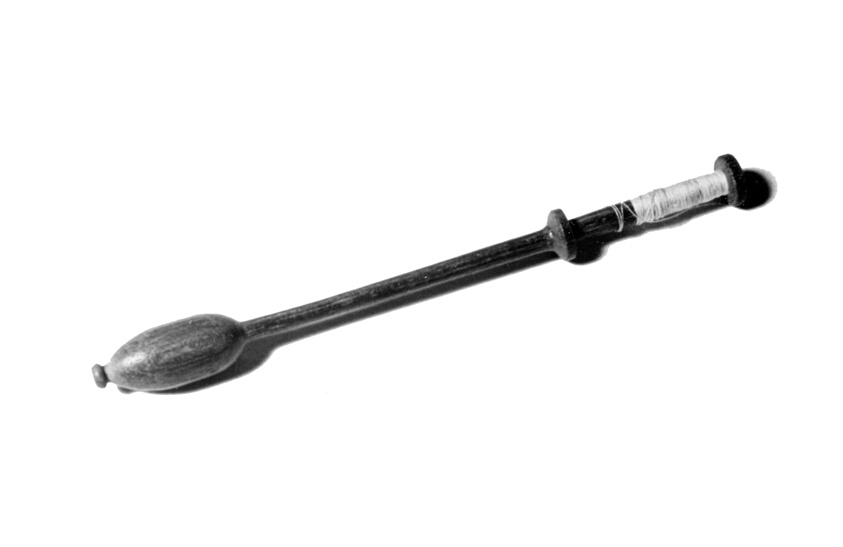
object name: Textile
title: Lace Bobbin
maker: Belgium, Brussels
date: 18th century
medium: Plain wood with bulb end; wound with linen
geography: Brussels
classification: bobbins; textile